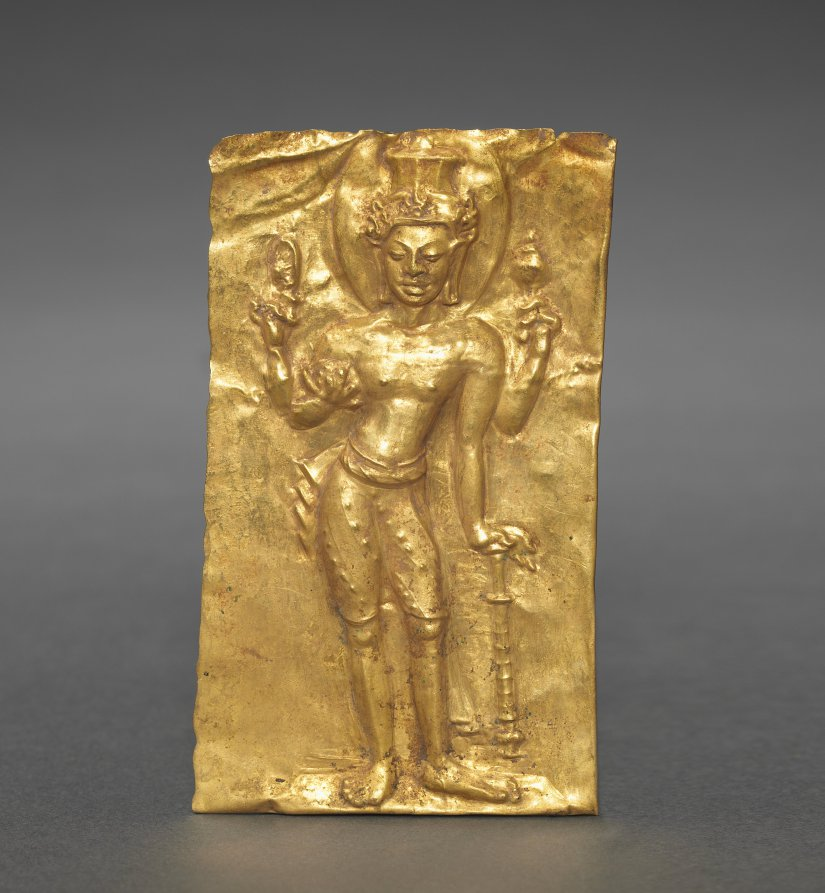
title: Plaque with Vishnu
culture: Thailand, Sri Deb Style, Mon-Dvaravati period, c. 7th-8th Century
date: c. 600s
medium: gold repoussé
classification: Metalwork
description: Images made in India during the Gupta period (AD 300s to 600s) were influential in shaping the early development of Buddhist and Hindu art in Southeast Asia. This gold token depicts the Hindu god Vishnu, identified by the flat-topped crown, his four arms, and attributes: wheel, conch shell, club, and clod of earth. Noteworthy for its naturalism is the foreshortening of his right foot. Such precious gold objects were made to be secreted under a sacred stone icon in Thailand or Cambodia to infuse the temple with wealth and glory.